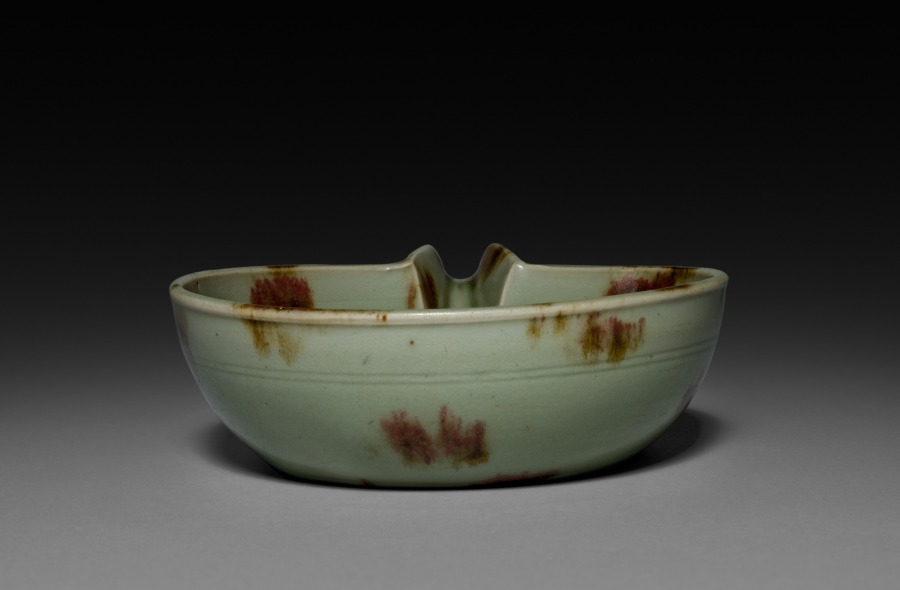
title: Spouted Bowl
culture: China, Zhejiang province, Longquan region, Yuan dynasty (1271-1368)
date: 1300s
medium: Celadon-glazed stoneware spotted with copper red, Longquan ware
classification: Ceramic